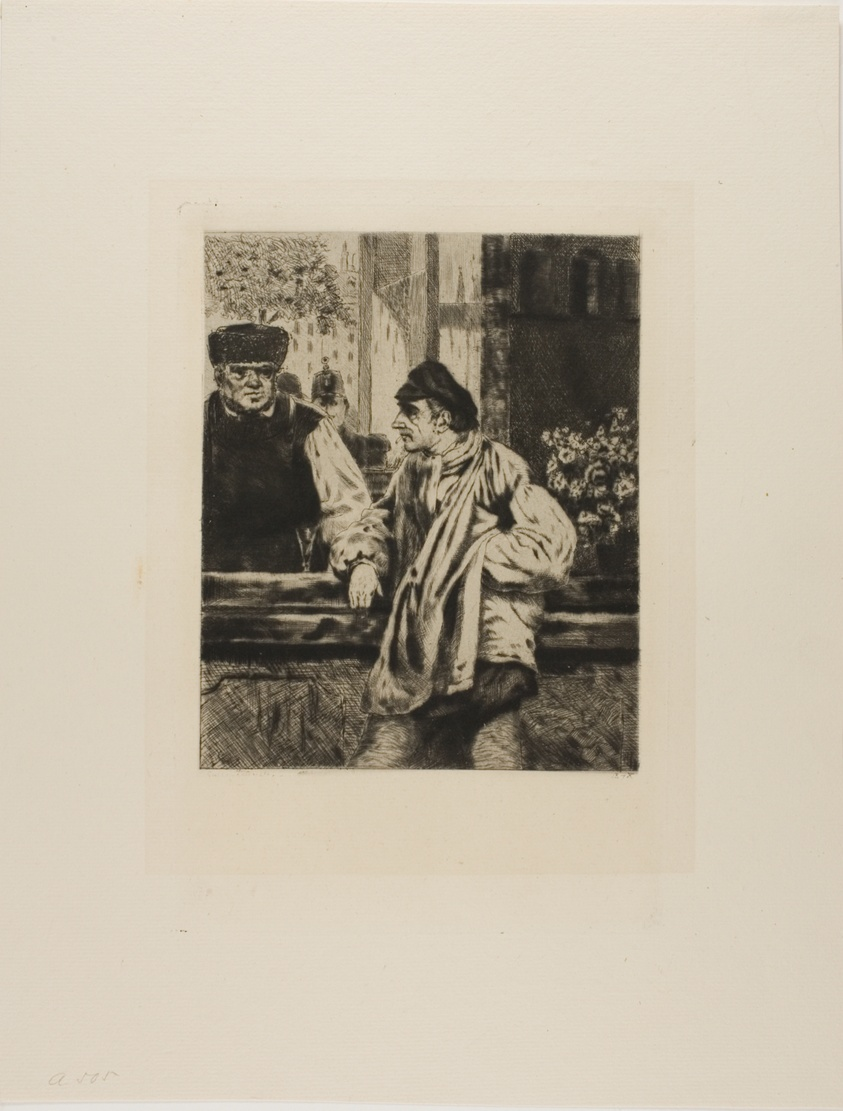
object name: Print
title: Plate from l'Assommoir (man leaning on bar)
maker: Gaston La Touche (French, 1854-1913)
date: 1878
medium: Drypoint on ivory laid paper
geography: France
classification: drypoint; print; prints and drawing